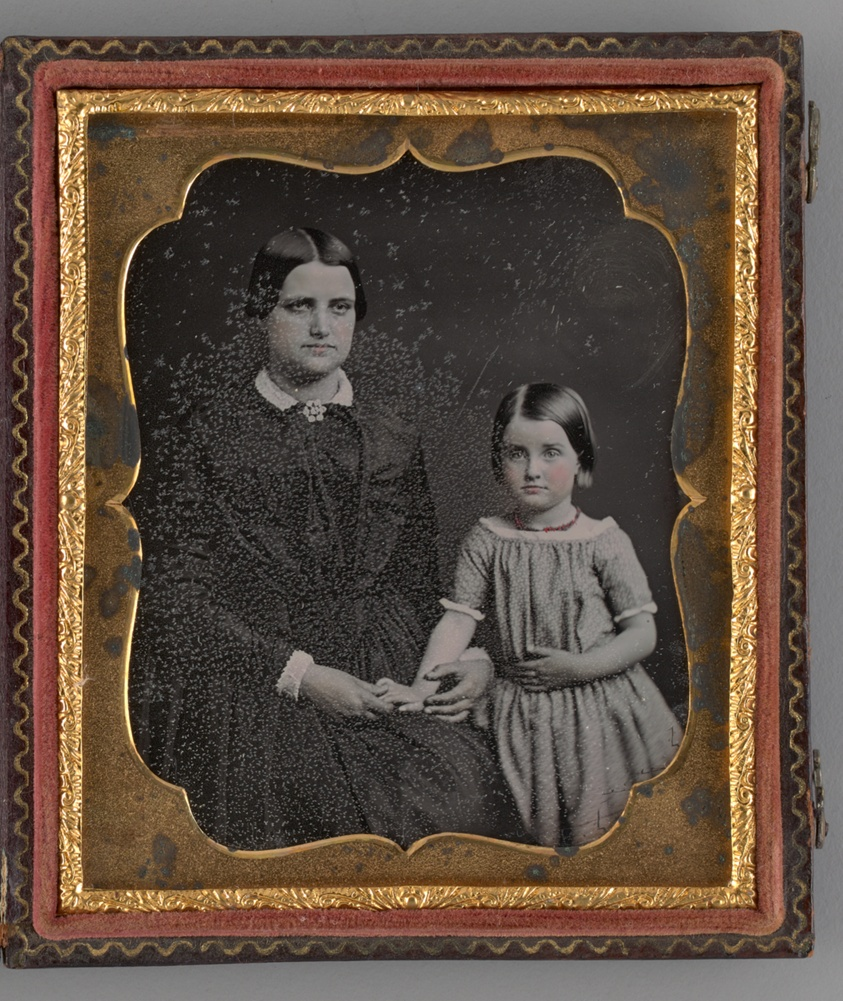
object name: Photograph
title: Untitled (Portrait of a Woman and a Child)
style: 19th century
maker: Unknown maker; American, 19th century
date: 1850s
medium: Daguerreotype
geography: United States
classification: portrait; photograph; photographic process; photography; portrait; daguerreotype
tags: lundberg collection, portraits, portraits: child subject, portraits: female subject, photography, portrait, portraits: multiple subjects